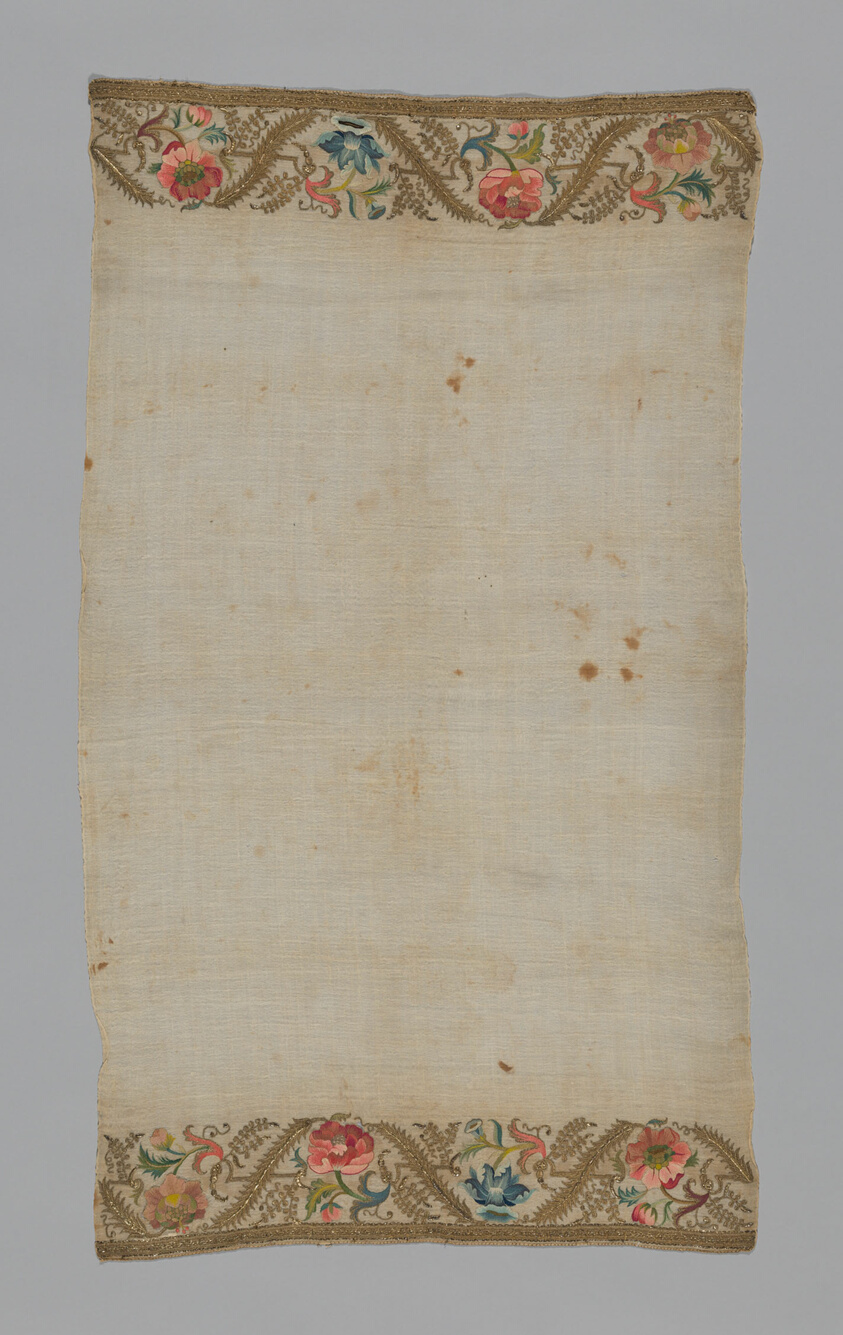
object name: Textile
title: Towel/Napkin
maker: Turkey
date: 1875/1900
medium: Cotton, plain weave; embroidered with silk and gilt metal strip and gilt metal strips in darning, fishbone, overcast, padded overcast, running, twined double runningl Russian overcast, satin and padded satin stitches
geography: Turkey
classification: textile; needlework (visual works); weaving